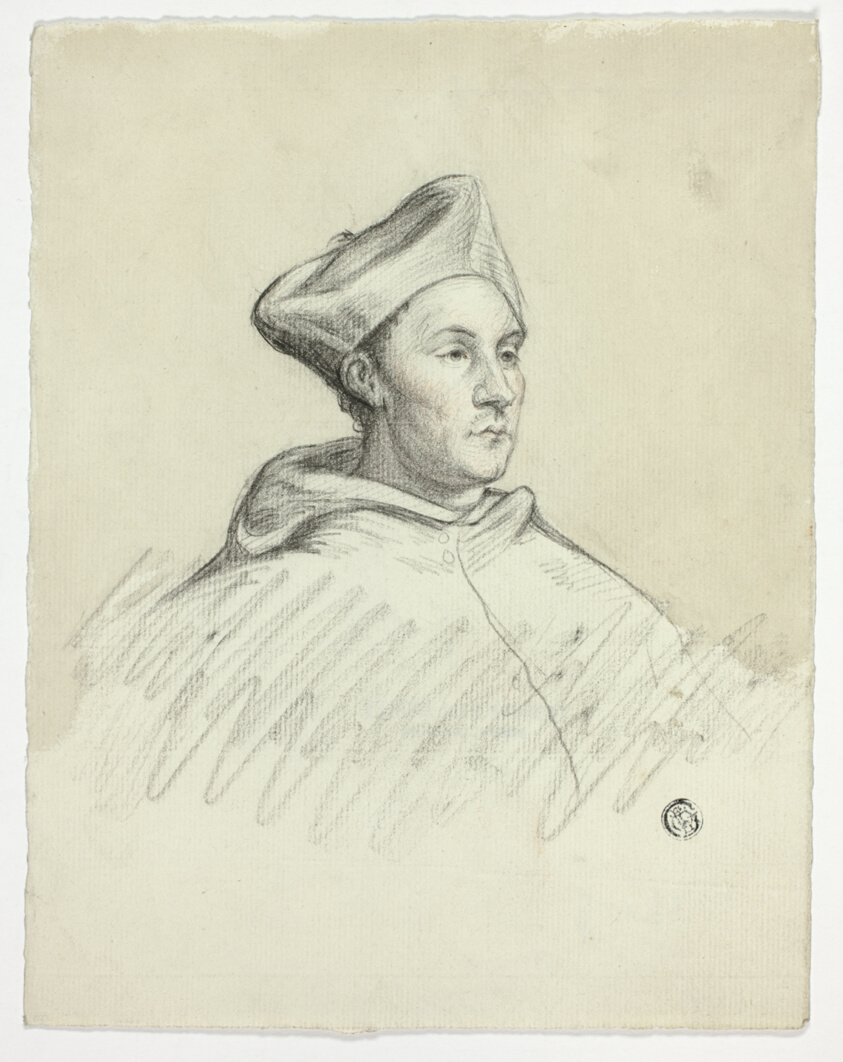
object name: Drawing and Watercolor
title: Portrait of a Cardinal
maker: After Anthony van Dyck; Flemish, 1599-1641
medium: Charcoal, with red chalk, and brush and pale brown wash, on off-white laid paper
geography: Flanders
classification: chalk; drawings (visual works); prints and drawing